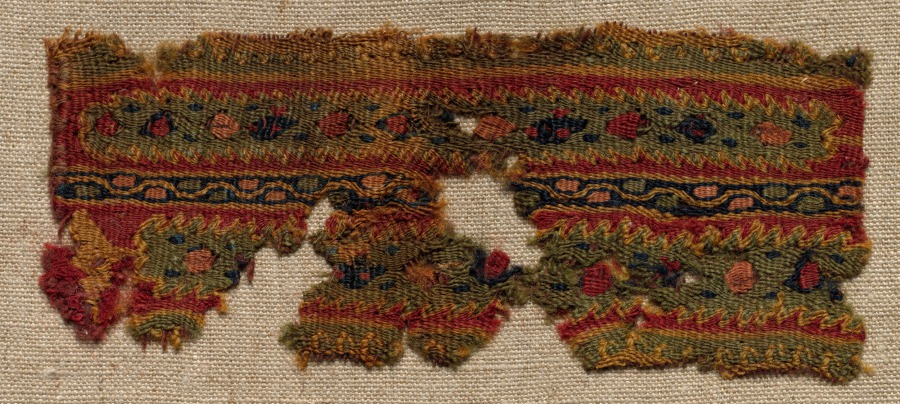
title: Fragment, Probably Part of an Ornament of a Tunic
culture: Egypt, Byzantine period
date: 400s - 600s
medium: tapestry weave: wool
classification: Textile